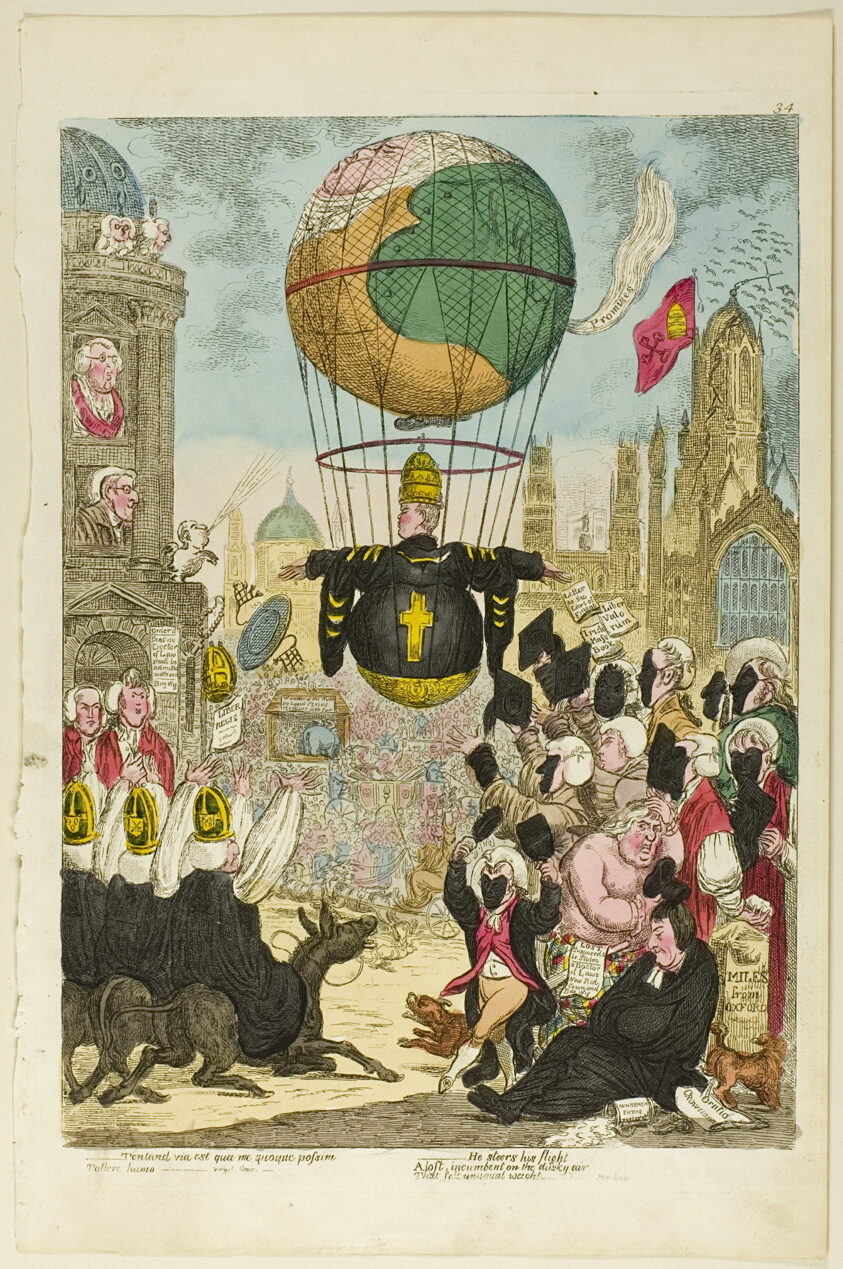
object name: Print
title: Tentand via est qua me quoque possim tollere humo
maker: James Gillray (English, 1756-1815); published by Hannah Humphrey (English, c. 1745-1818)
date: published August 8, 1810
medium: Hand-colored etching on paper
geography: England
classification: etching; print; prints and drawing